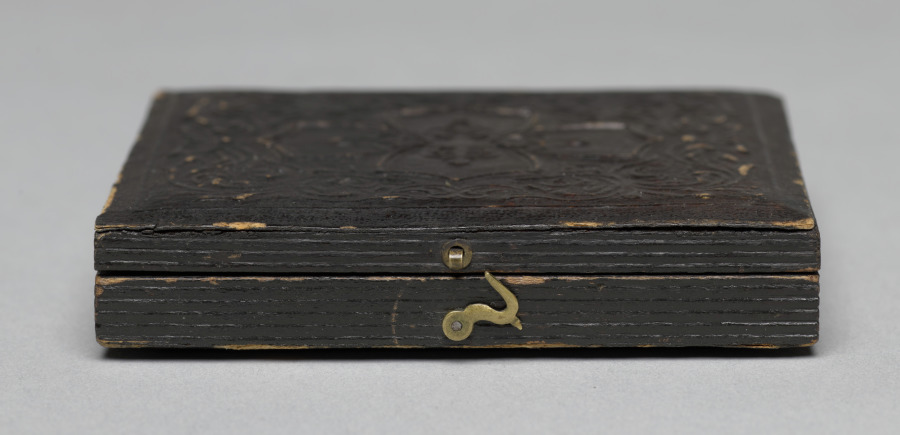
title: Civil War soldier with painted bivouac background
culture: America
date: c. 1861–65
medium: ambrotype, sixth plate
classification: Photograph